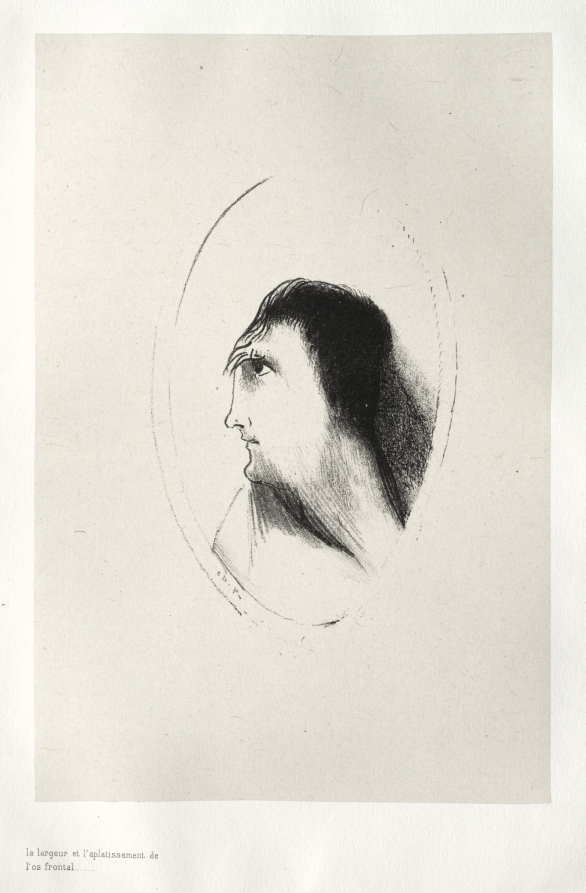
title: The Breadth and Flatness of the Frontal Bone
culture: France, late 19th Century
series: The Haunted House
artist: Odilon Redon (French, 1840–1916)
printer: Auguste Clot (French, 1858–1936)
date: 1896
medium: lithograph on China paper laid on wove paper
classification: Print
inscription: printed at lower left, below image: la largeur de l'aplatissement de l'os frontal.....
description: Odilon Redon was a voracious reader of contemporary literature, and such texts often influenced his art. This series was inspired by The Haunted and the Haunters, an 1859 novel by British writer Edward Bulwer-Lytton. Redon’s prints capture the book’s mysterious tone and emphasis on the supernatural through vague but evocative imagery that sometimes borders on abstraction. By this time a seasoned expert in lithography, the artist collaborated with master printer Auguste Clot. Their combined technical skills allowed for the rich tonal variation seen here, made by turning Redon’s lithographic crayon on its side, layering various marks, and even scratching directly into the surface of his stone.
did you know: One of Redon's greatest patrons, the occultist René Philipon, commissioned this portfolio as a supplement for his French translation of Bulwer-Lytton's The Haunted and the Haunters.